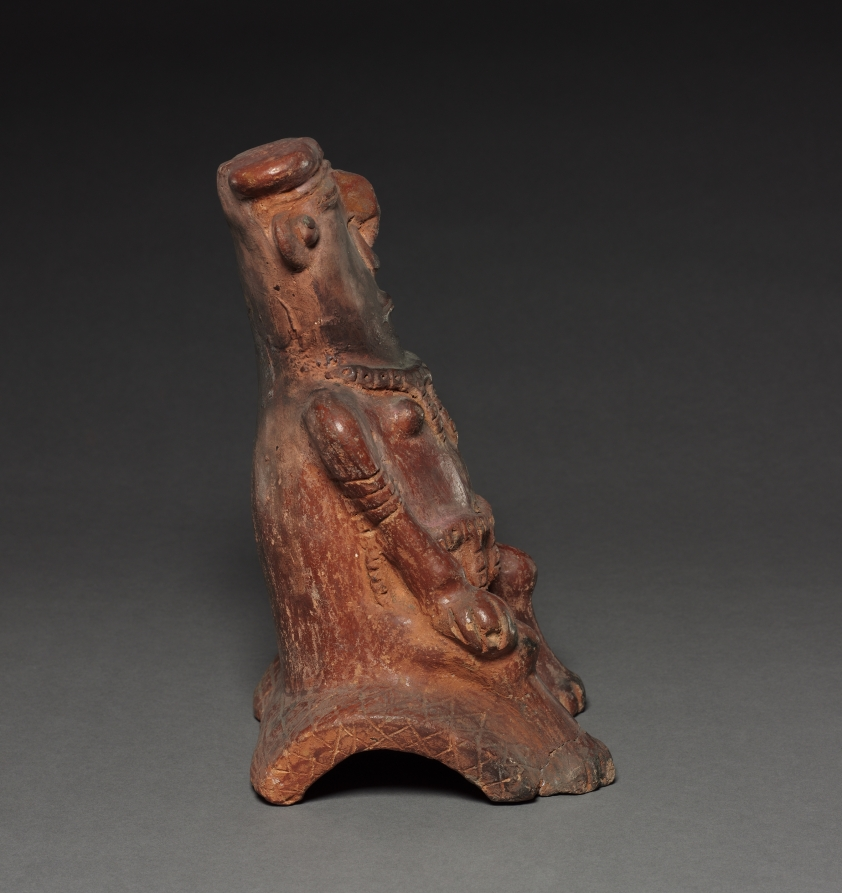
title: Seated Figure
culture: Colombia, 19th-20th century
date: before 1921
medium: red ware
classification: Ceramic